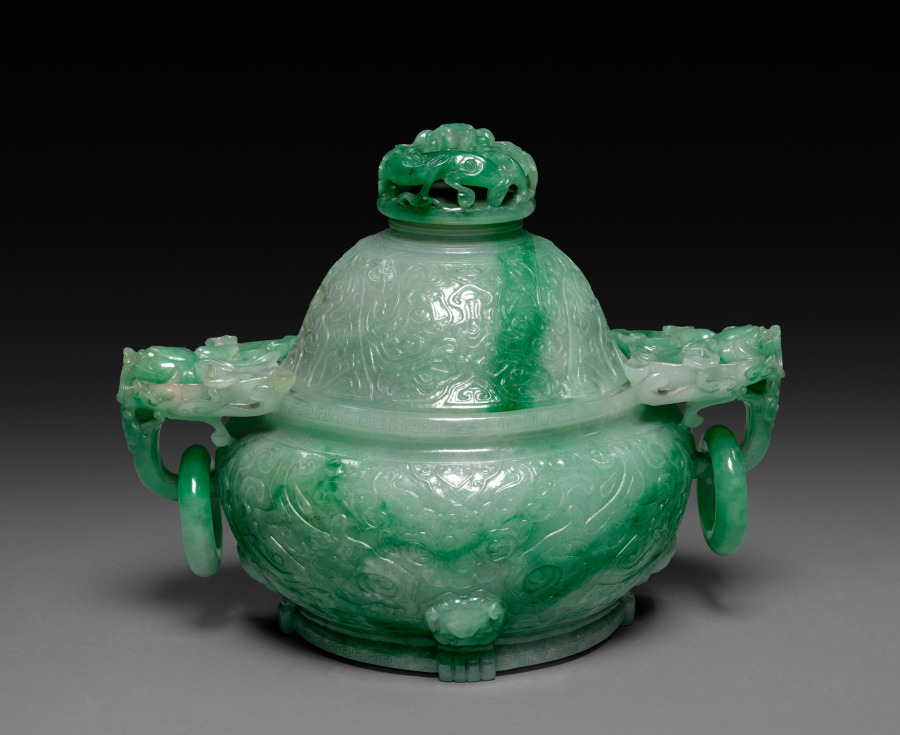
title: Incense Burner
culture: China, Qing dynasty (1644–1911), Qianlong reign (1736–95)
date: 1736–95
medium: jade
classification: Jade